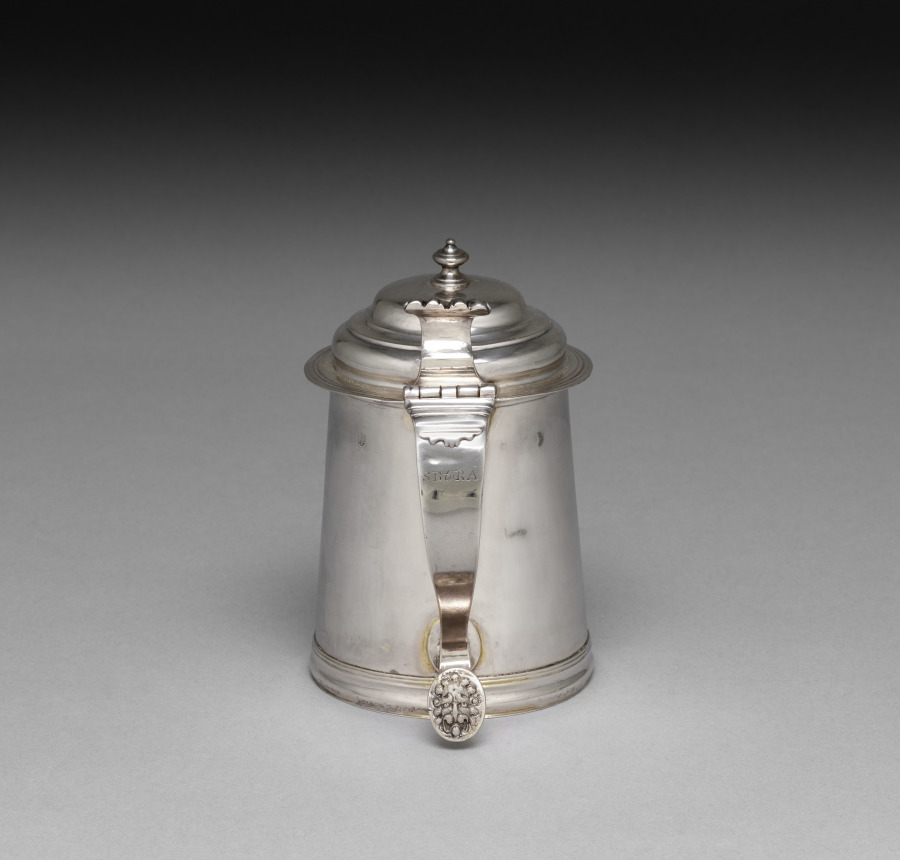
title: Tankard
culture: America, Massachusetts, Boston, early 18th century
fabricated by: John Edwards (British)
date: 1715–1720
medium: silver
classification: Silver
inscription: Engraved on handle: "SB to RA".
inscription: Stamped on side: "IE".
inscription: Engraved underside: "B" above "S.C".